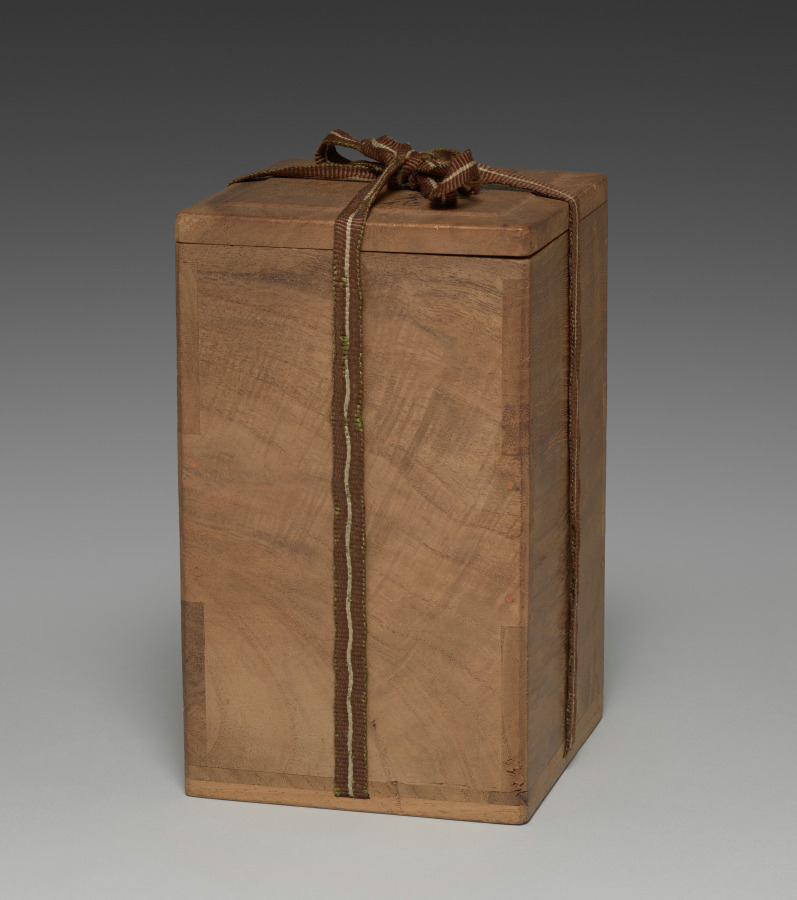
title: Vase with Dragon Roundels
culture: Japan, Meiji period (1868–1912)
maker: Seifū Yohei III (Japanese, 1851–1914)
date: 1900–1914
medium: Porcelain with purple glaze and molded and carved design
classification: Ceramic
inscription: 清風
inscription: 成山清風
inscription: The top of the box lid describes the vase.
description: Each side of this lavender-colored vase is nearly covered with a low-relief design of a four-clawed dragon curled around a flaming jewel. The box lid carries an attestation by Yohei IV that the vase was produced by his predecessor, and the signature on the base is one Yohei III used later in his career. The lid also makes reference to Jun (J. Kin) ware, which was made in numerous kilns in what is now Yuzhou or Yuxian in Henan Province, China, during the Northern Song dynasty. Some Jun wares had an opalescent purple glaze, which was clearly the inspiration for the color seen on this vase.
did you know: Kyoto-based Japanese ceramist Seifū Yohei III (1851–1914) admired the glaze colors found on Chinese porcelain and tried to replicate them through intensive experimentation.